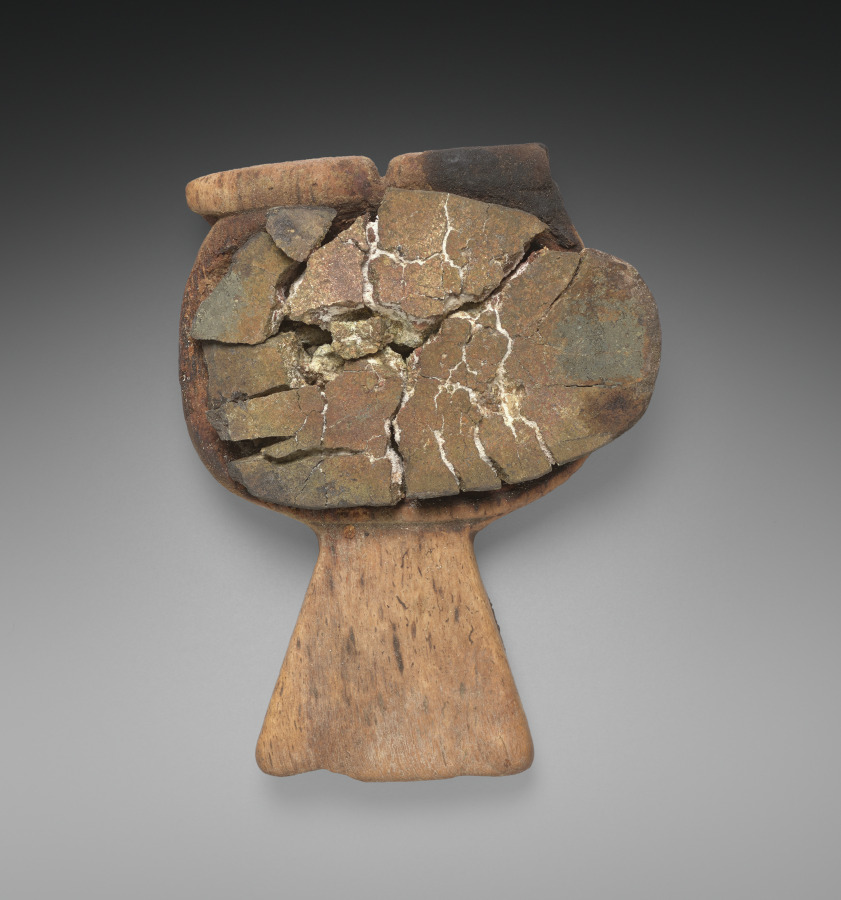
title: Mirror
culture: Peru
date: 1000–1532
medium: wood and iron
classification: Cosmetic Objects